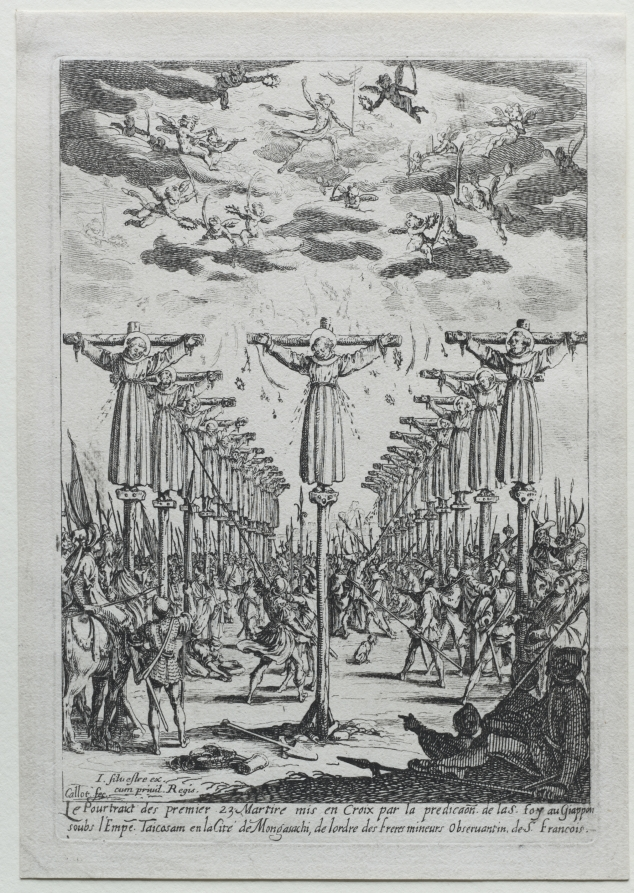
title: The Martyrs of Japan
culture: France, 17th century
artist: Jacques Callot (French, 1592–1635)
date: 1627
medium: etching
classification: Print